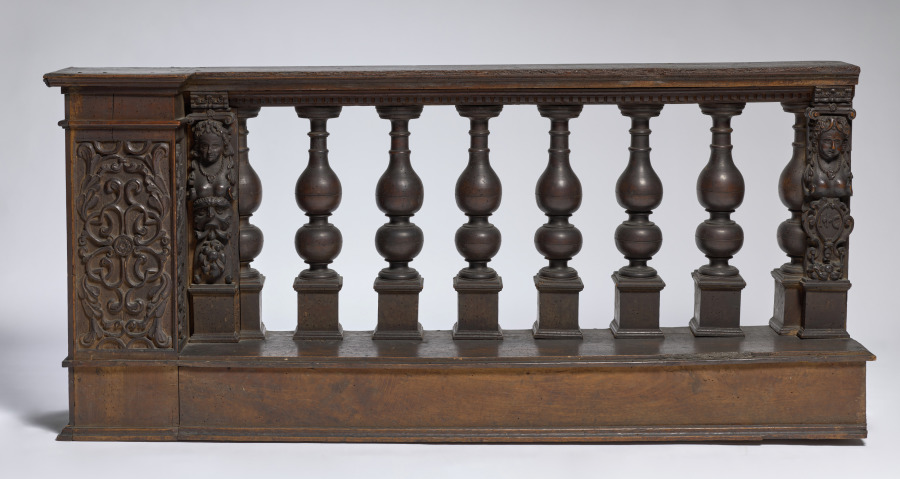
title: Balustrade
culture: Italy, 17th century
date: c. 1630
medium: carved and turned walnut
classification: Furniture and woodwork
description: This balustrade, or railing, was probably intended for use in a private house, perhaps to set off a bed alcove.